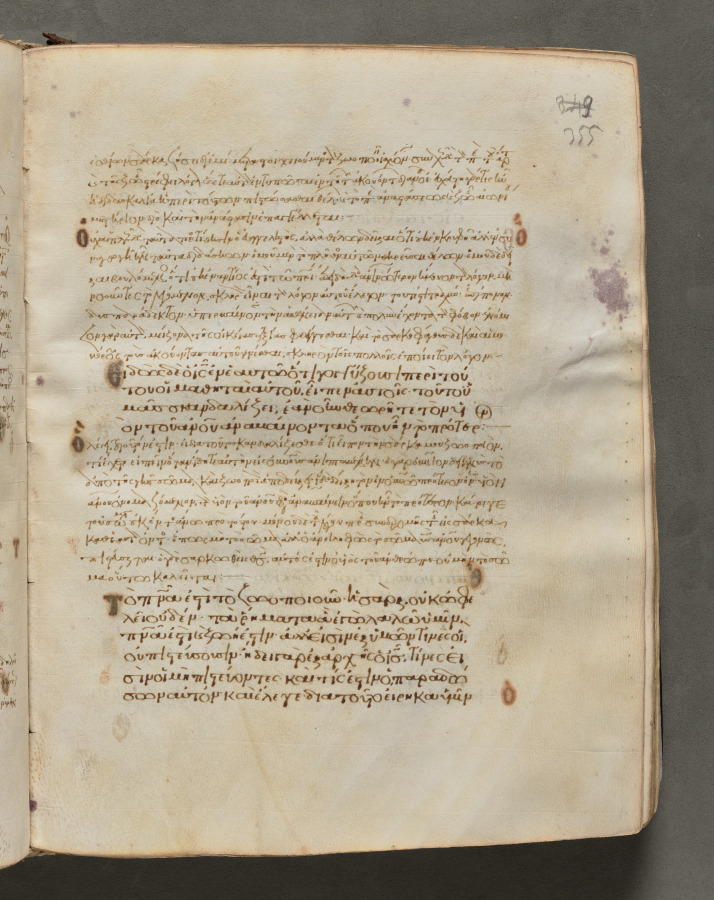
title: Text, folio 355 (recto), from a Gospel Book with Commentaries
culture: Byzantium, Constantinople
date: c. 1000–1100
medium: ink, tempera, and gold on vellum; leather binding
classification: Bound Volume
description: Each of the four gospels in this book opens on a page with brilliantly illuminated borders depicting the author of the text as well as birds—principally peacocks, symbols of the immortality of the soul—and fountains, representing the fountain of life and the salvation of the soul. This volume consists of 428 leaves with texts in Greek. Its level of sophistication suggests that it was probably written and decorated in a monastery in Constantinople.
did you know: Gospel books were carried in procession through Byzantine churches.